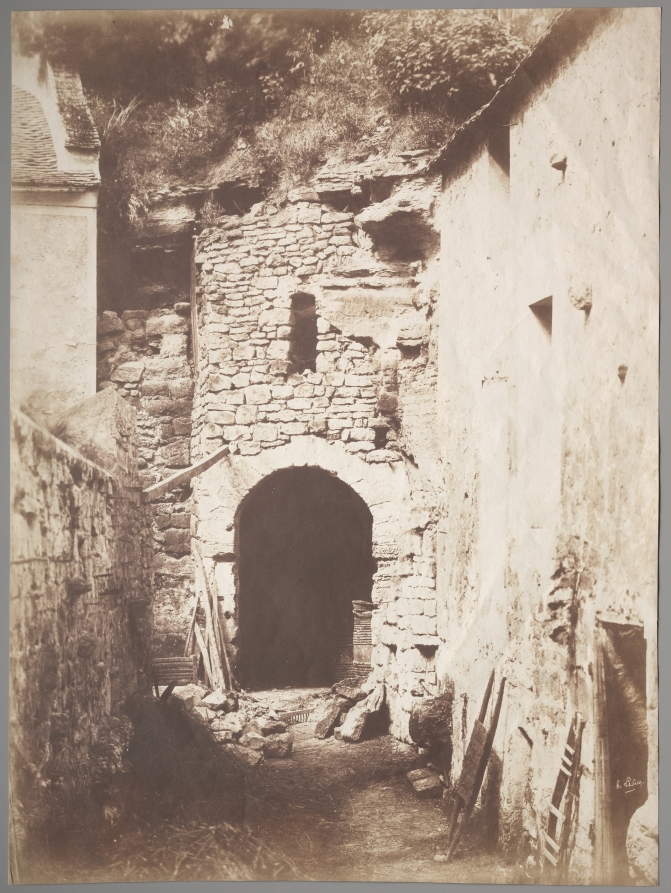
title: Behind the Troglodyte Farm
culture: France, 19th century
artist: Henri Le Secq (French, 1818–1882)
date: c. 1853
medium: salted paper print from waxed paper negative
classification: Photograph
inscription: Printed into the image, at the bottom right corner: " h. Le secq."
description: This large-scale print, exceptional for the period, belongs to a small group of photographs by Henri Le Secq of troglodyte, or cave, dwellings in western France near the Loire River. Around the 1400s, the term troglodyte referred to groups of political activists who lived underground in order to avoid property taxes, which only applied to above-ground dwellings.